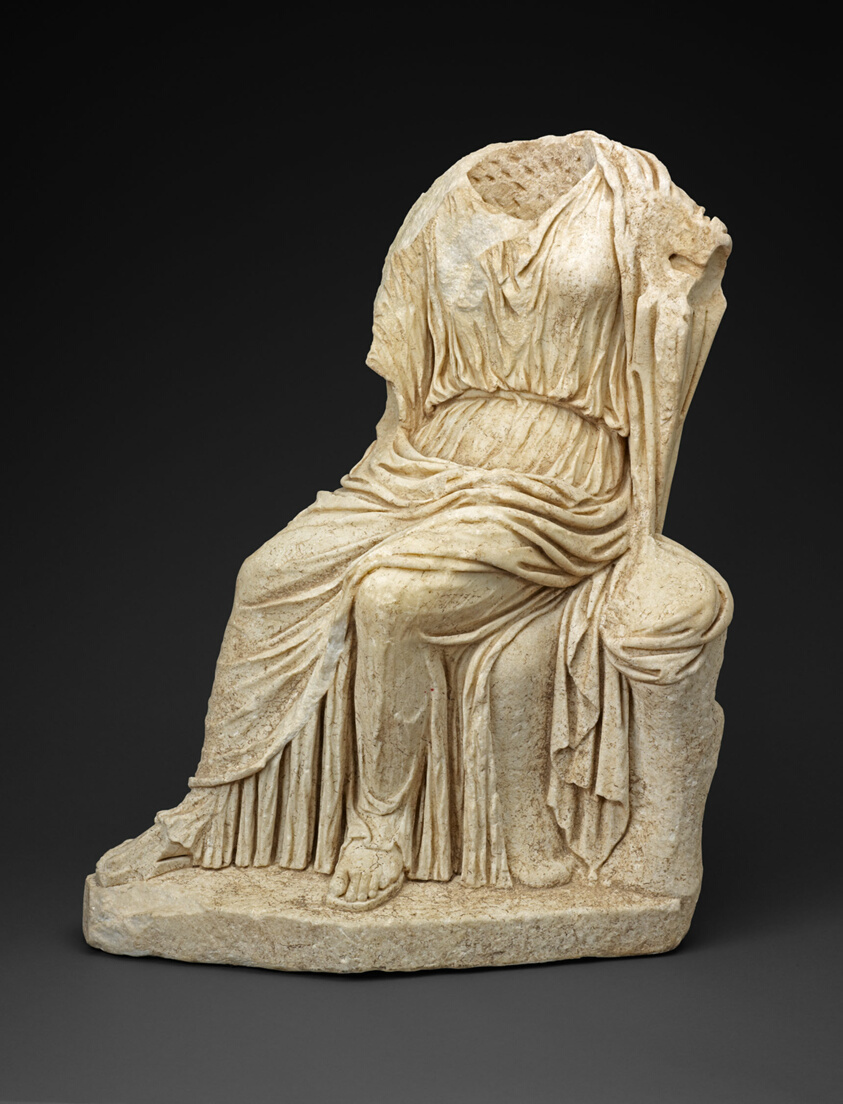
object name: Sculpture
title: Statue of a Seated Woman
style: imperial (roman), ancient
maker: Roman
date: 2nd century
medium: Marble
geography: Roman Empire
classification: marble; stone; sculpture; ancient art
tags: goddesses, mythology, gods (deities), woman